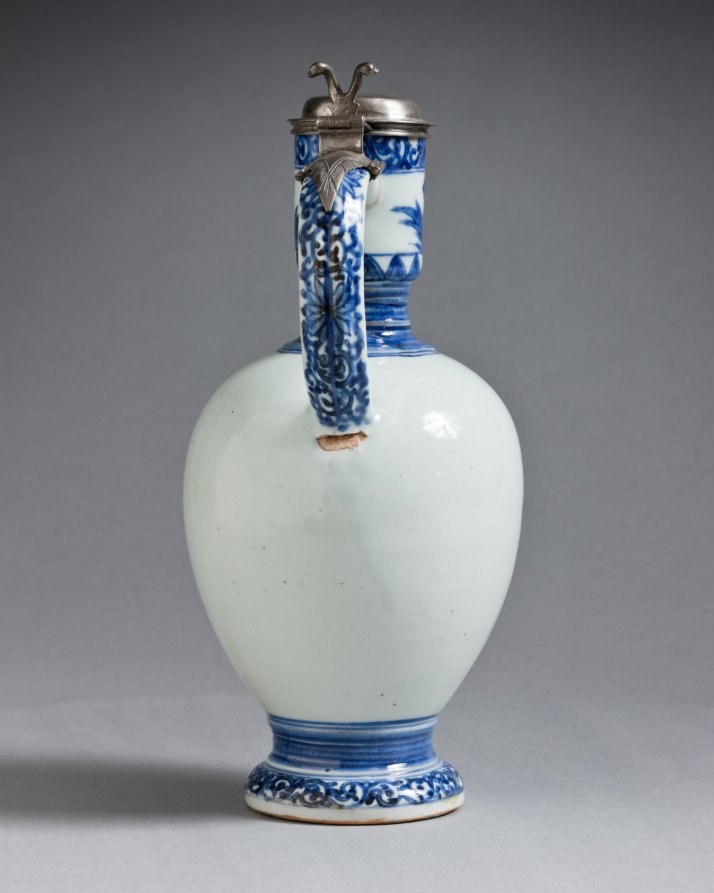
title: Jug with Silver Mounts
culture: Japan, Edo period (1615–1868)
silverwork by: Barent van Leeuwen (Dutch, 1637–1682)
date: c. 1662–76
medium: porcelain with underglaze blue decoration and silver mounts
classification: Ceramic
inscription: [on silver]: town mark for Amsterdam; lion rampant crowned (alloy mark for 0-934 silver); d (date letter for 1666), maker's mark of Barent van Leeuwen.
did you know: The coat of arms on this jug are those of the Valckenier family, active in the Dutch East India Company.